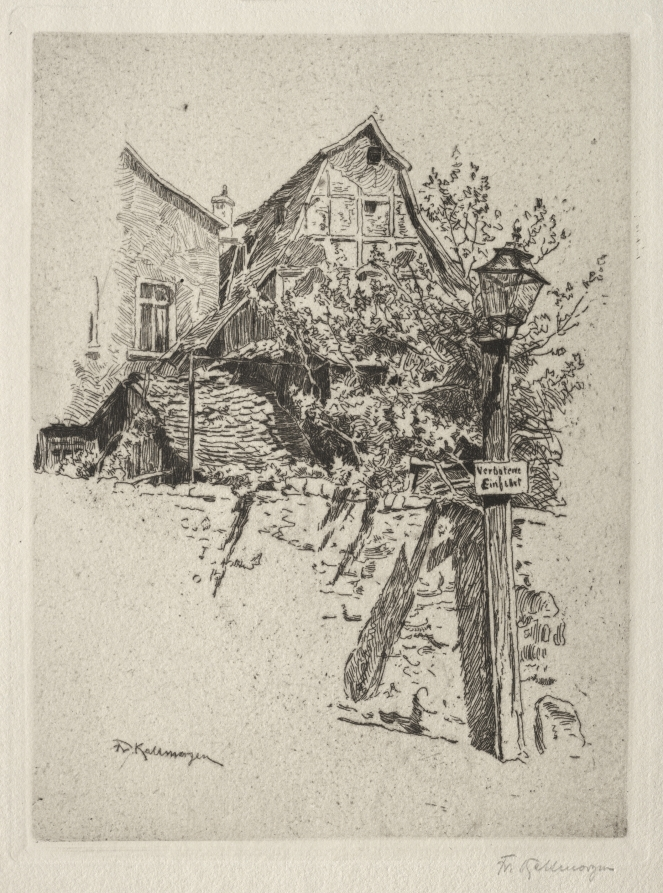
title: Verlorener Winkel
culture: Germany, 19th century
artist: Friedrich Kallmorgan (German, 1856–1924)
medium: etching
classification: Print